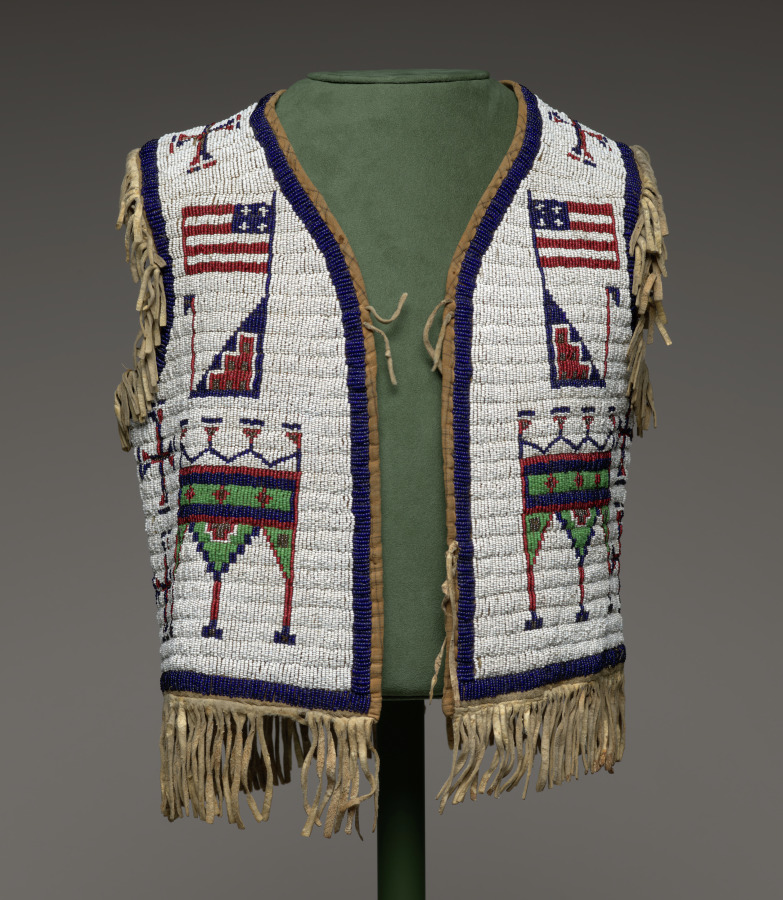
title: Boy's Vest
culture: Plains, Lakota (Sioux), 19th century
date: c. 1880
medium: beadwork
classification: Garment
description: For centuries, beautiful garments and objects have held great meaning for the native groups of the Great Plains. For instance, the Lakota (Sioux) ceremonially intone something sacred wears me. That is, humans don powerful garments but are worn, animated, and protected by the sacred forces within their materials and imagery. By 1700 European Americans began to make their presence felt in the region, and Plains people creatively adopted European materials and garment types into their wardrobes. By 1870 most Plains people had been forced onto reservations, and traditional life shattered—especially for men. The garments on display here all were made after that date.